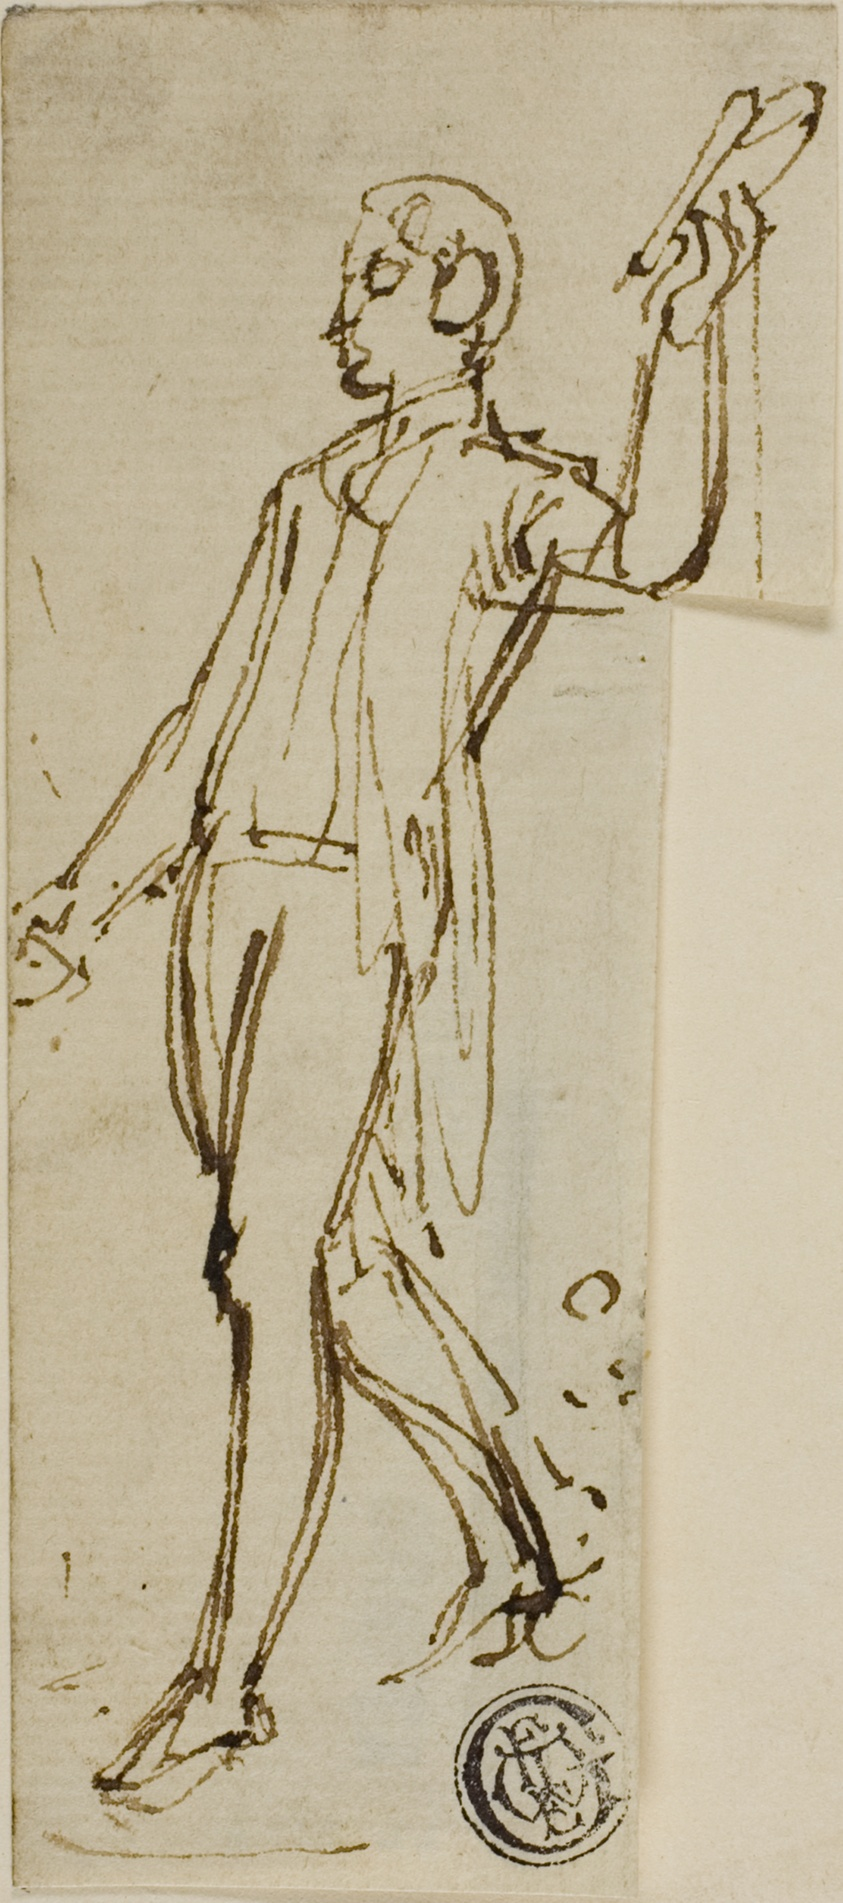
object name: Drawing and Watercolor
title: Sketch of Standing Man with Uplifted Arm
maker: Attributed to Thomas Stothard; English, 1755-1834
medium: Pen and brown ink on ivory laid paper, tipped onto board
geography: England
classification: pen and ink drawings; drawings (visual works); prints and drawing